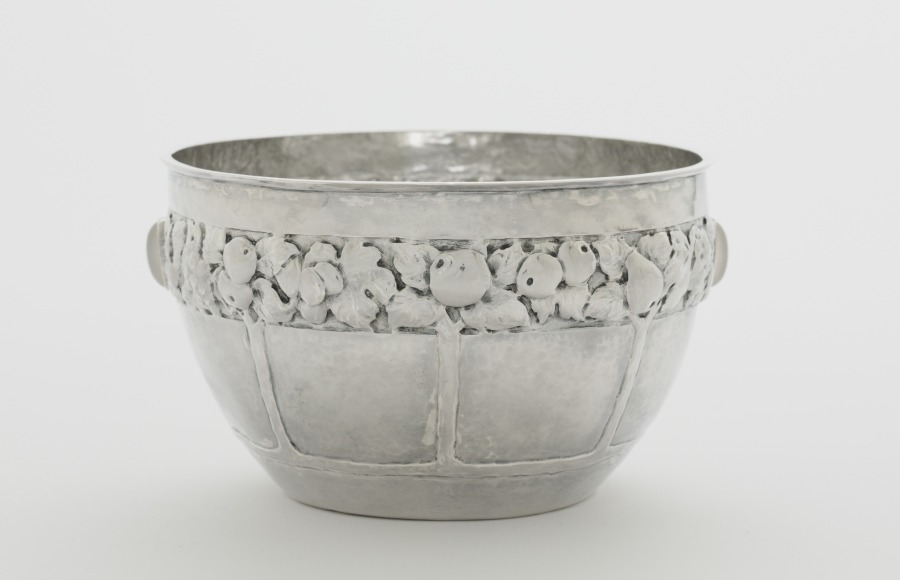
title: Waste Bowl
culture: America, Ohio, Cleveland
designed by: Louis Rorimer (American, 1872–1939)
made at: and Rokesley Shop (American)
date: c. 1910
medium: silver, moonstones, ebony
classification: Silver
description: This tea and coffee service was designed for production by the Rokesley Shop, a collaborative group working at Louis Rorimer’s studio. Reacting against industrial mass production, Rorimer emphasized inventive design in finely crafted objects.